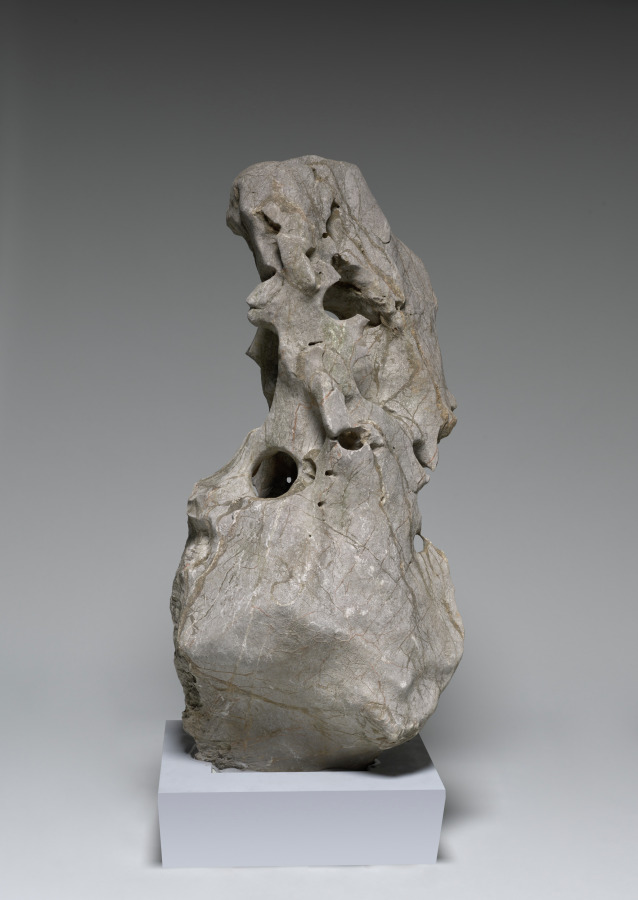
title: Taihu Garden Stone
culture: China, Jiangsu province, Wuxi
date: 0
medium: Limestone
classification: Stone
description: In China, rocks are considered elements of nature that possess spirit and life energy. With its upward winding masses, perforations, weathered surface, and multiple viewpoints, the stone exhibits sculptural qualities and embodies constant transformation through natural forces and human intervention. A solid piece of rock, it was originally sourced from the Lake Tai region. Stones were collected, set up in gardens, or installed on scholar’s desks as miniature mountains. Traditionally, Taihu stones were the most desirable type of rock. This stone is a gift by the contemporary artist Liu Dan, known for his depictions of rocks, who calls them "the stem cells of Chinese landscape."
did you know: The donor, Liu Dan, is the most prominent and celebrated painter of rocks in contemporary China.